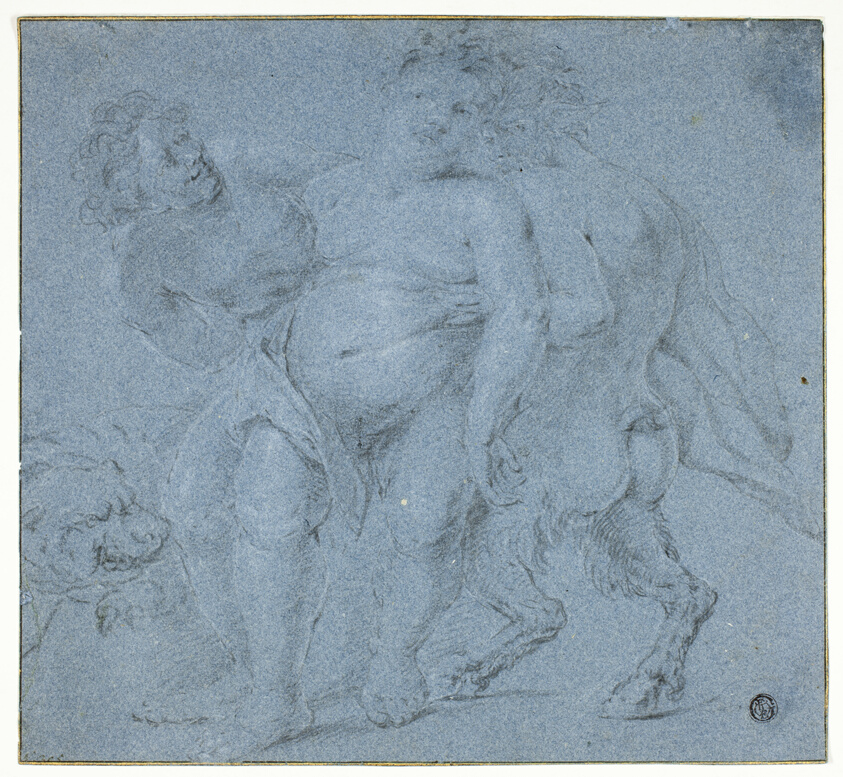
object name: Drawing and Watercolor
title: Silenus Supported by Two Satyrs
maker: After Peter Paul Rubens; Flemish, 1577-1640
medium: Black and white chalk on blue laid paper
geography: Flanders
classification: chalk; drawings (visual works); prints and drawing